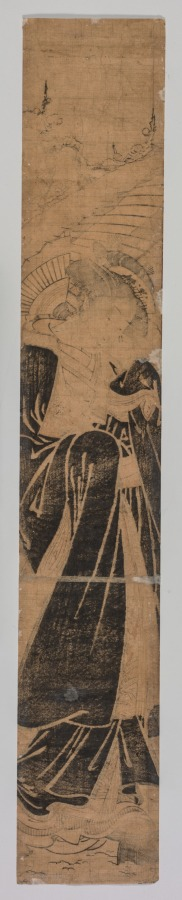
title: Beauty in Snow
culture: Japan, Edo period (1615–1868)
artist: Isoda Koryūsai (Japanese, 1735–1790)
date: 1765–1784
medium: color woodblock print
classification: Print